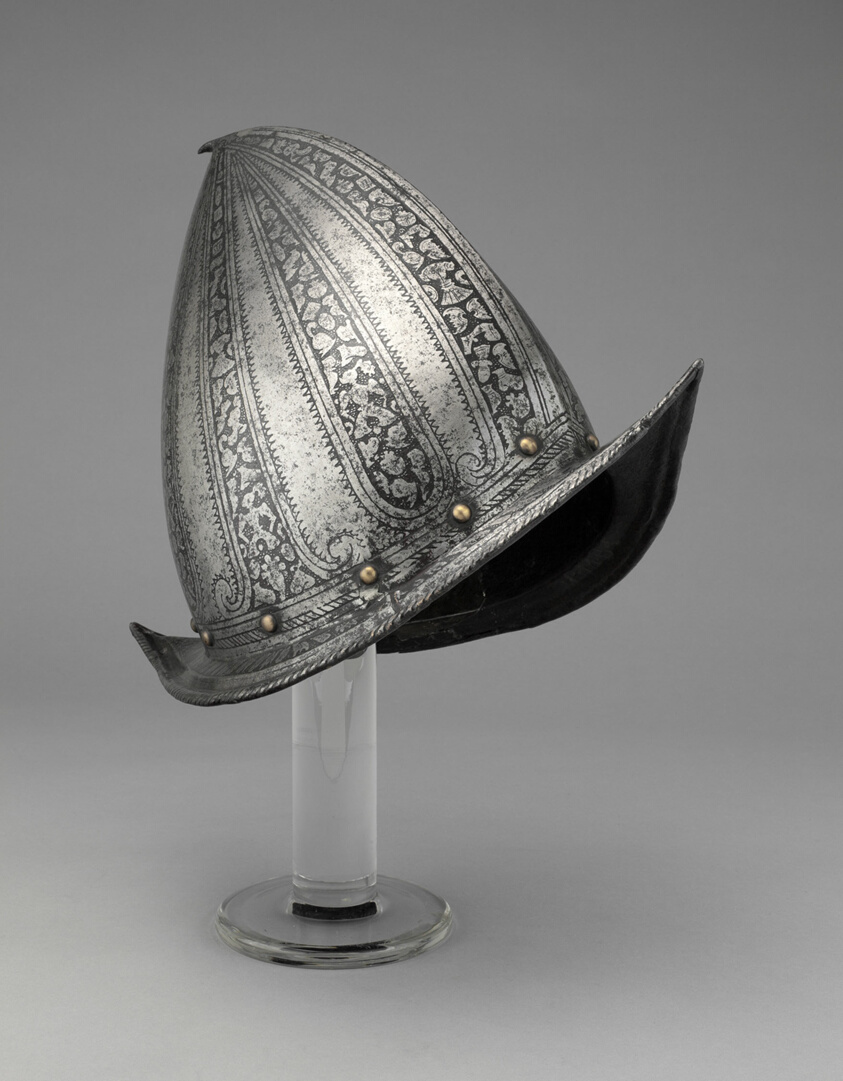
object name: Armor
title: Pointed Morion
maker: North Italian, probably Milan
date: c. 1580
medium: Steel and brass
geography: Milan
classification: suit-helmet; armor; arms and armor